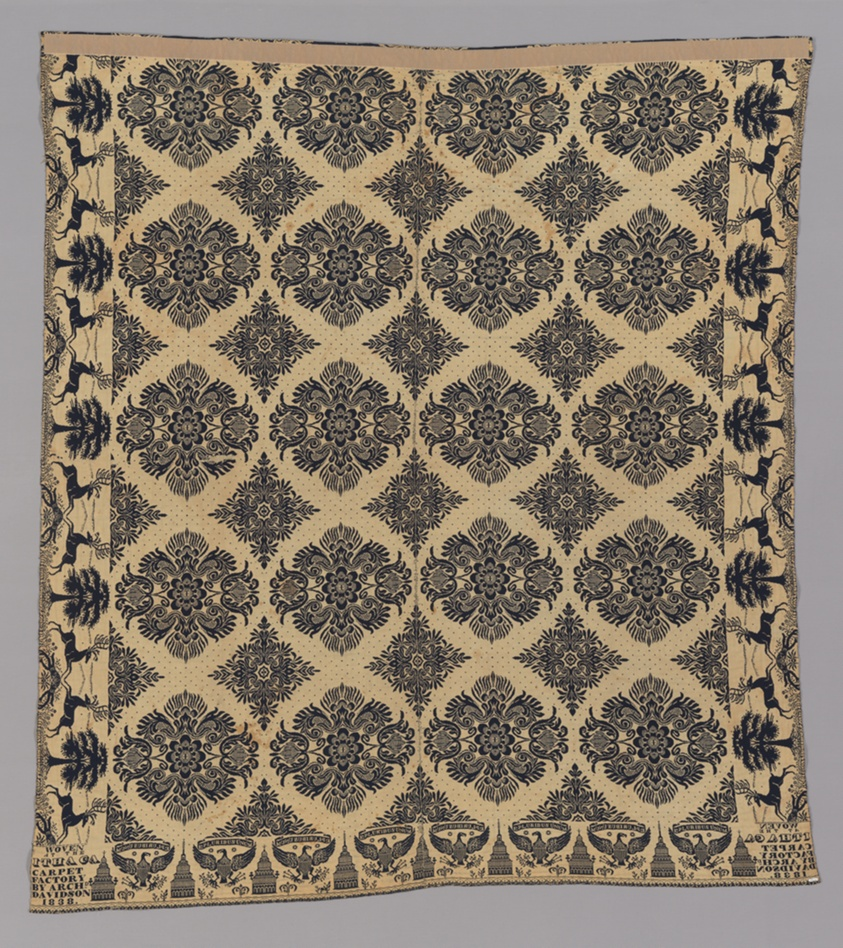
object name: Textile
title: Coverlet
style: 19th century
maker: Archibald Davidson (American, born Scottish, active 1832-1848); United States, New York, Tompkins County, Ithaca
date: 1838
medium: Cotton and wool, plain weave double cloth; woven on loom with Jacquard attachment; two loom widths joined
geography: New York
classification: weaving - coverlet; coverlet; weaving; textile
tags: medallions, arrows, united states of america, animals, dots, buildings, foliage, tulips, flowers, trees, deer, eagles, coverlet